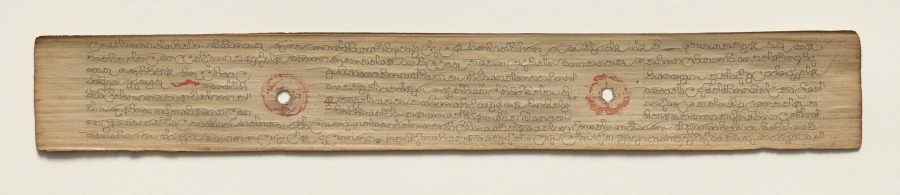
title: Leaf from a Buddhist Manuscript (verso)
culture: Sri Lanka, Singhalese, Late 17th century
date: c. 1700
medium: fiber paper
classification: Manuscript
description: Palm leaf material is still used for manuscripts in Sri Lanka. The palm leaves are prepared first by boiling them, drying them in the sun, and then rubbing them with oils. Scribes then use a metal stylus to incise the text. Then charcoal powder is wiped across the pages, filling in only the inscribed lines.